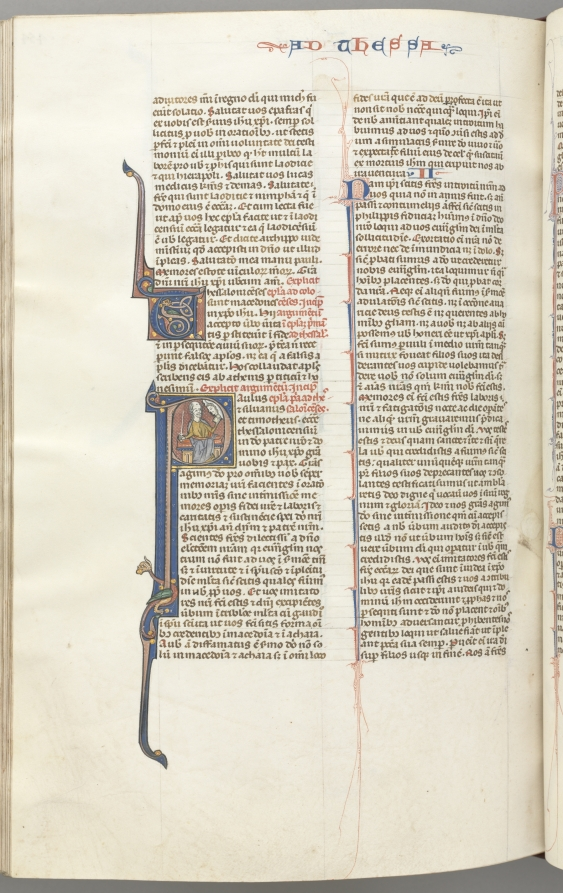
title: Fol. 454v,Thessalonians I, historiated initial P, Paul seated with a sword and a book, talking to the bust of God above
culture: Southern France, Toulouse(?), 13th century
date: c. 1275–1300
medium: ink, tempera and gold on vellum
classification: Bound Volume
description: Biblical manuscripts were highly prized and important possessions of churches, monasteries, cathedral schools, and universities throughout medieval Europe. The biblical texts were known as the vulgate, the translations made by Saint Jerome in the fourth century from Hebrew and Greek into Latin, which became the definitive and official Latin version of the Roman Church. In the 13th century, the bible was, for the first time, produced as a single volume with an officially sanctioned sequence to its books and chapters as illustrated by this example. The very extensive decoration of this bible is arranged hierarchically to indicate the relative importance of the various texts so that full or almost full-page initials mark the openings of the first prologue, Genesis, and the first Gospel; historiated initials mark the beginning of each book and illuminated initials mark the Prologues.